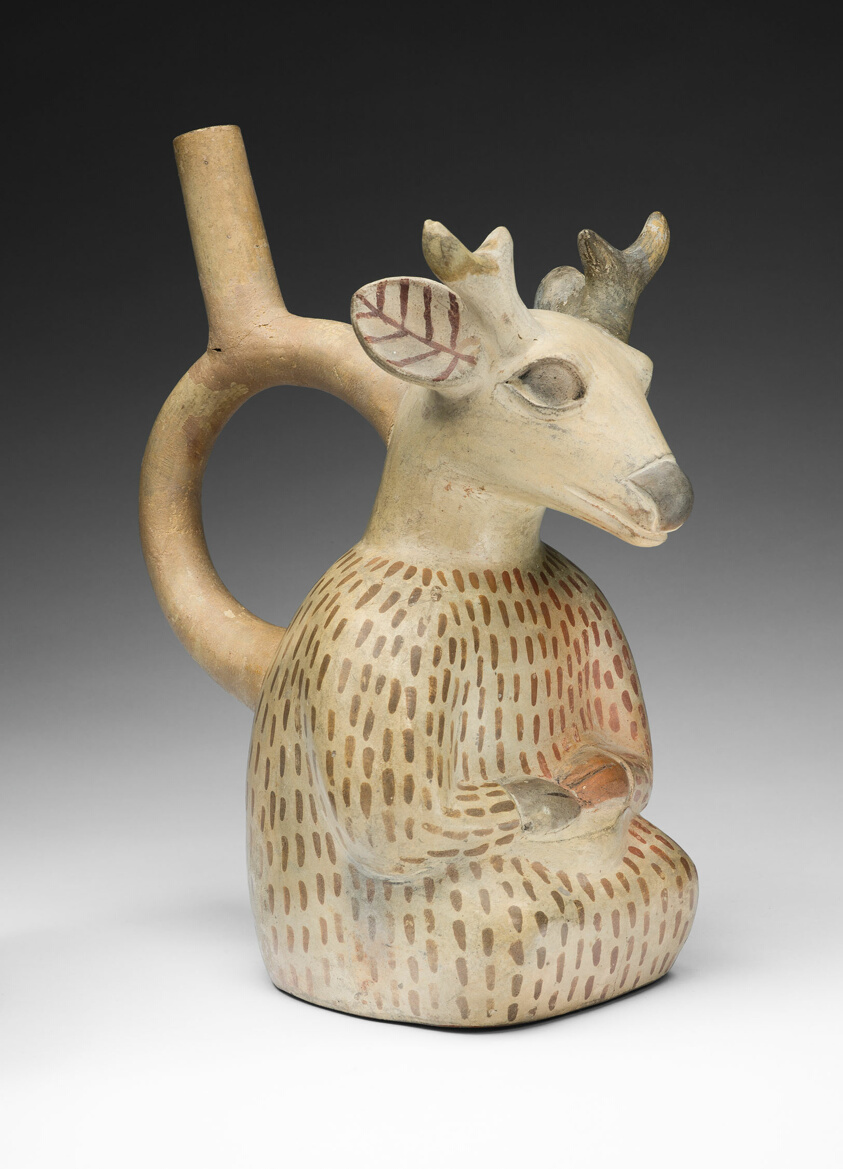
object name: Vessel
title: Vessel in the Form of a Deer Impersonator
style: moche, americas, andes, Arts of the Americas, andean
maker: Moche (Chimbote, Santa Valley, north coast, Peru)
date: 100 BCE–500 CE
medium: Ceramic and pigment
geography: Santa Valley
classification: earthenware; ceramics; vessel; art of the americas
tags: impersonation, animals, sacrifice, deers, anthropomorphic figure